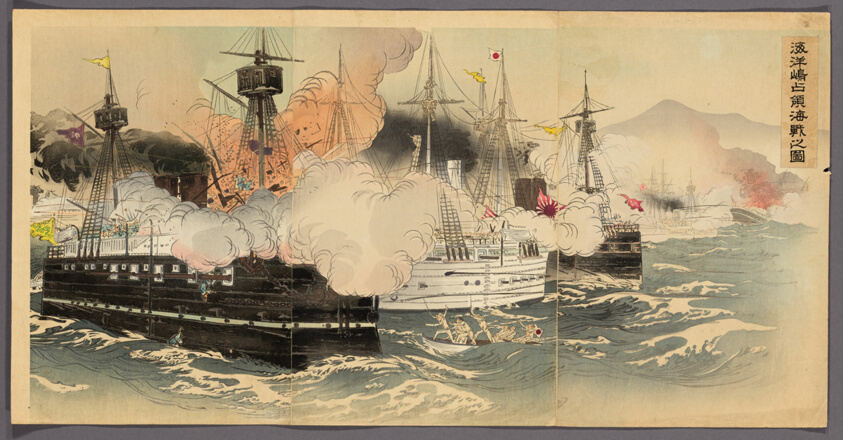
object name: Print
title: The Naval Battle and Capture of Haiyang Island (Kaiyoto senryo kaisen no zu)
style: Japanese (culture or style)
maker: Ogata Gekko (Japanese, 1859-1920)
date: 1894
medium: Color woodblock print; three sheets of oban tetraptych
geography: Japan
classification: woodblock print; print